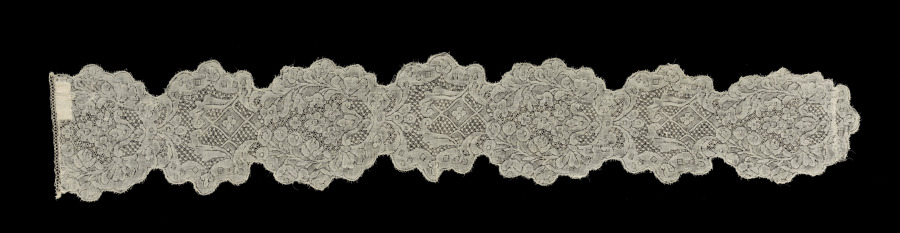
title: Lace Lappet (one of a pair)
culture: Belgium, Binche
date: 1700s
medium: Linen: bobbin lace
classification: Lace